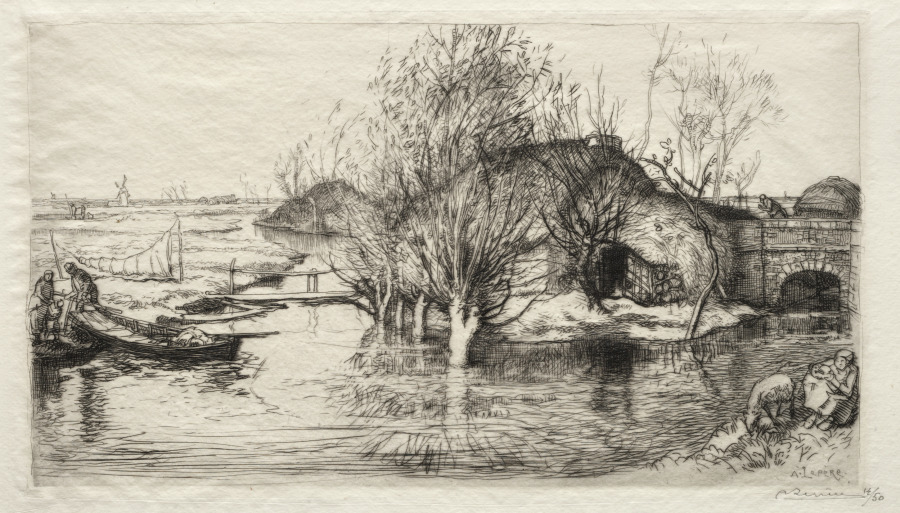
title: La Masure Inondée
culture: France, 20th century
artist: Auguste Louis Lepère (French, 1849–1918)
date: 1915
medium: etching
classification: Print